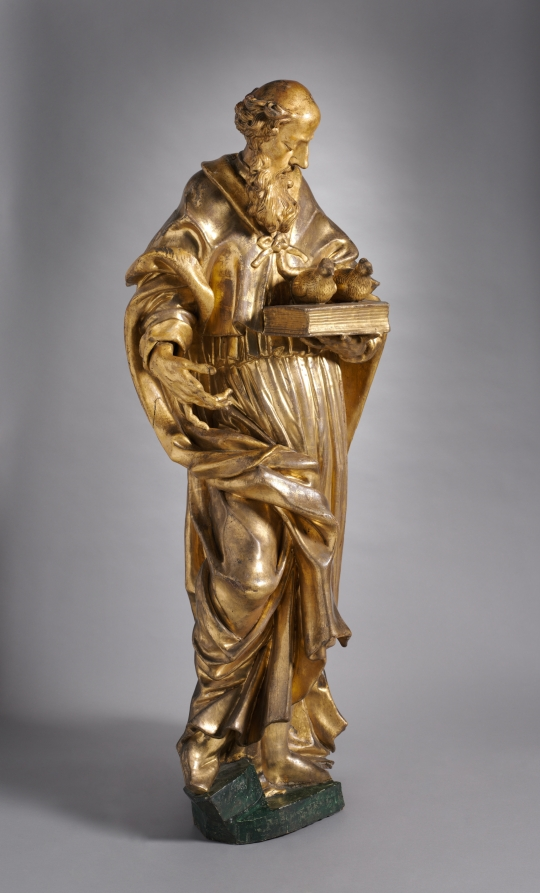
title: Saint Joachim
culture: Germany, 18th century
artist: Joseph Anton Feuchtmayer (German, 1696–1770)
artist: or Circle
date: c. 1760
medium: gilded wood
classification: Sculpture